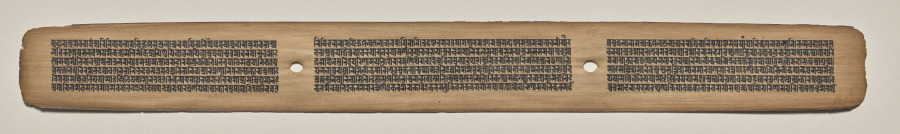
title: Text, folio 49 (recto), from a Manuscript of the Perfection of Wisdom in Eight Thousand Lines (Ashtasahasrika Prajnaparamita-sutra)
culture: Eastern India, Bihar, Vikramashila Monastery. Painting: Nepal, Kathmandu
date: Sunday, September 14, 1119 (year 239 of the Newar Samvat in the month of Ashvina)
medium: gum tempera and ink on palm leaves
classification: Painting